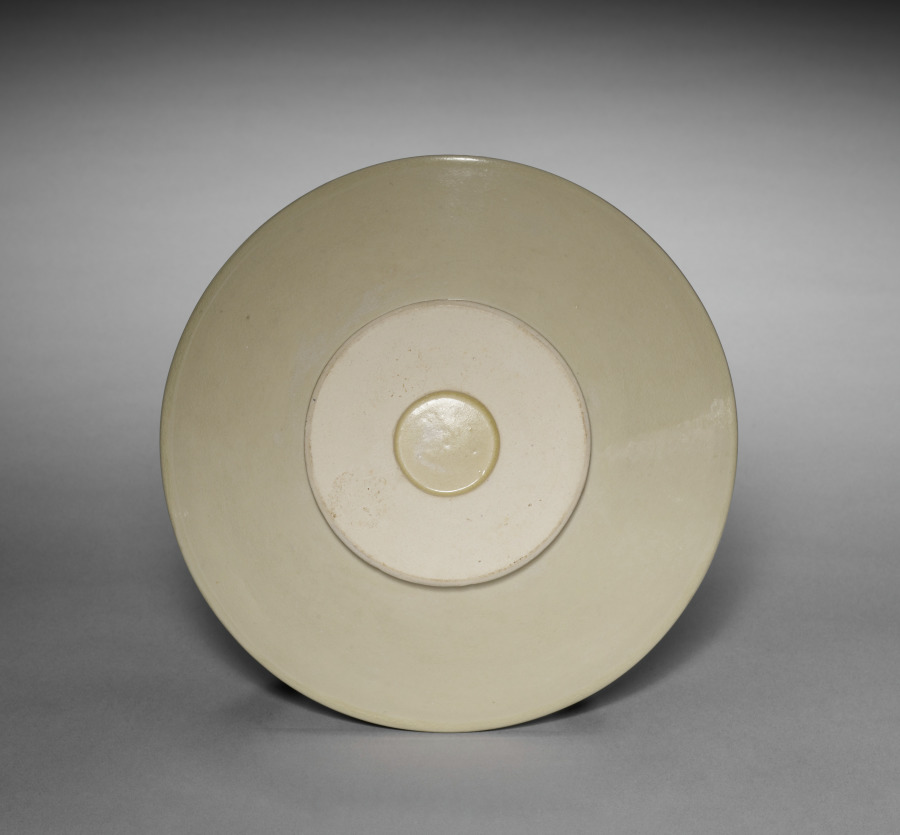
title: Ding Ware Bowl of the Xing Type with Bi-Disc Foot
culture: China, Henan province, Gongxian kilns, Five dynasties (907–60)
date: 907–60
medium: White stoneware with ivory-white glaze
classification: Ceramic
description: An ivory-colored glaze covers this shallow bowl with a solid flat foot ring, revealing an almost pure white body. Bowls of this type and shape were used for drinking tea and were traded as far as Samarra (modern Iraq). Red tea consumed during the Tang dynasty (618–906) was believed to look best in pale green or white-glazed bowls. When white whisked powdered tea was introduced a century later during the Song dynasty (960–1279), tastes and aesthetics for tea ceramics changed and dark-glazed teabowls were preferred.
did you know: The bowl’s foot ring is shaped like a Neolithic bi (璧), a flat jade disc with a central circular hole, which had some ritual function.